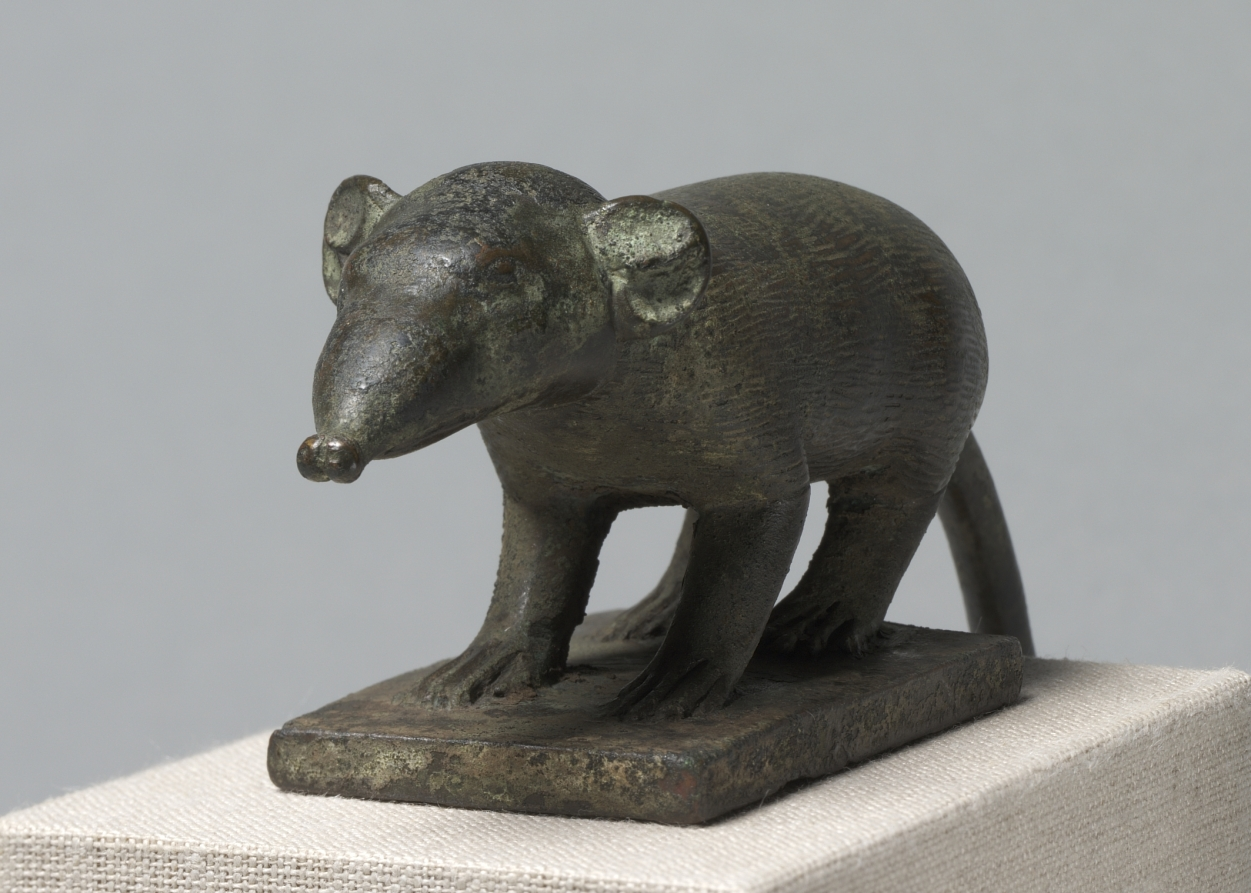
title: Shrew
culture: Egypt, Greco-Roman period (332 BCE–395 CE), Ptolemaic dynasty (305–30 BCE)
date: 305–30 BCE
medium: bronze, solid cast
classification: Sculpture